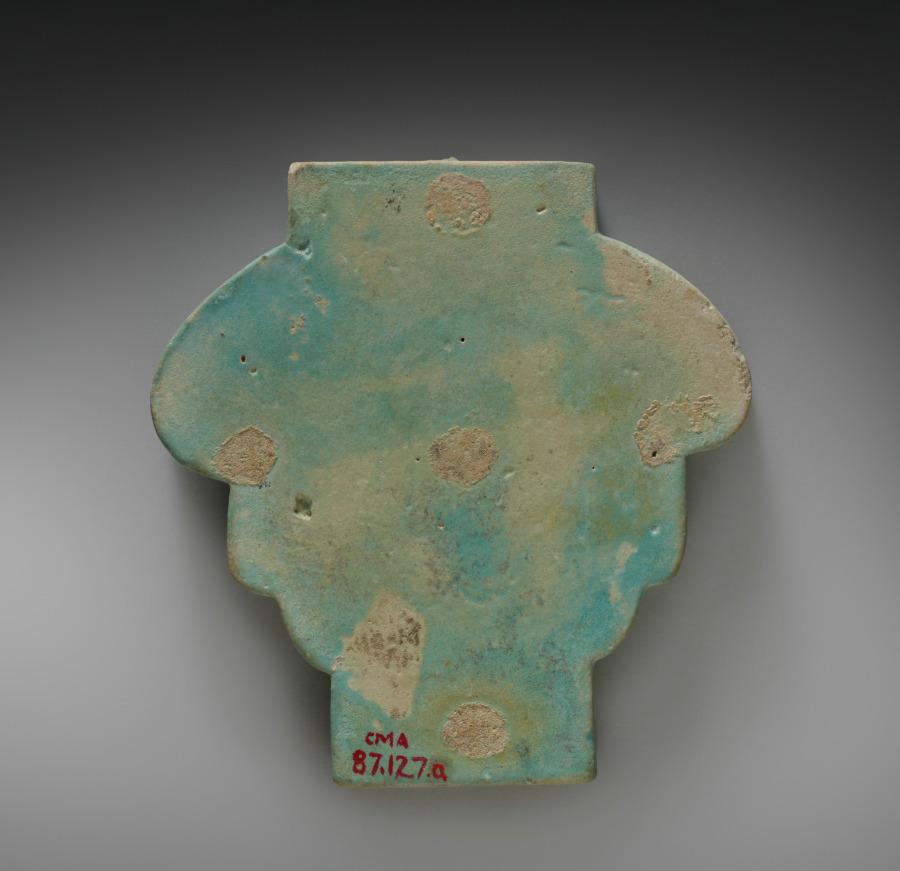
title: Box (Pyxis) in the Form of a Composite Capital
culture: Egypt, Greco-Roman period (332 BCE–395 CE), Ptolemaic dynasty (305–30 BCE)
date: 305–30 BCE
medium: pale robin's-egg blue faience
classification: Vessels